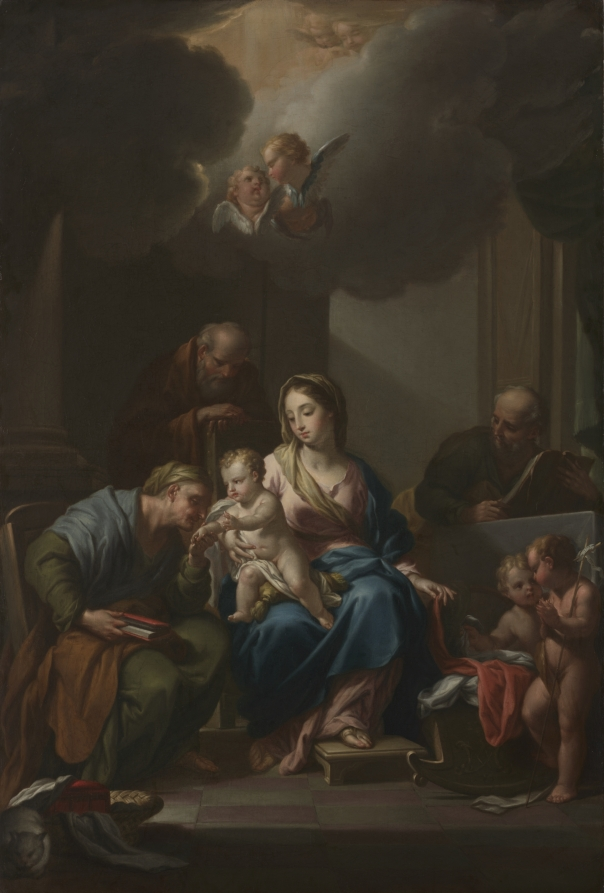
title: Presentation Sketch for "The Holy Family with Saints Anne, Joachim, and John the Baptist" (for Santa Maria in Via Lata, Roma)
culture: Italy, 18th century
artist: Francesco Trevisani (Italian, 1656–1746)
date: c. 1729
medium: oil on canvas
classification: Painting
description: During the early 1700s, Roman artists returned to fundamental Christian subjects, especially those focused on the Christ child. This work presents the Holy Family with Christ’s maternal grandparents and baby cousin, John the Baptist, stressing the importance of family relationships. Saints Anne and Joachim hold books, probably representing the Old Testament, reinforcing Christianity’s connection to the older Hebrew tradition. Trevisani’s tender visual language also looks explicitly back to Guido Reni, whose graceful approach to religious art remained immensely inspirational throughout the century.